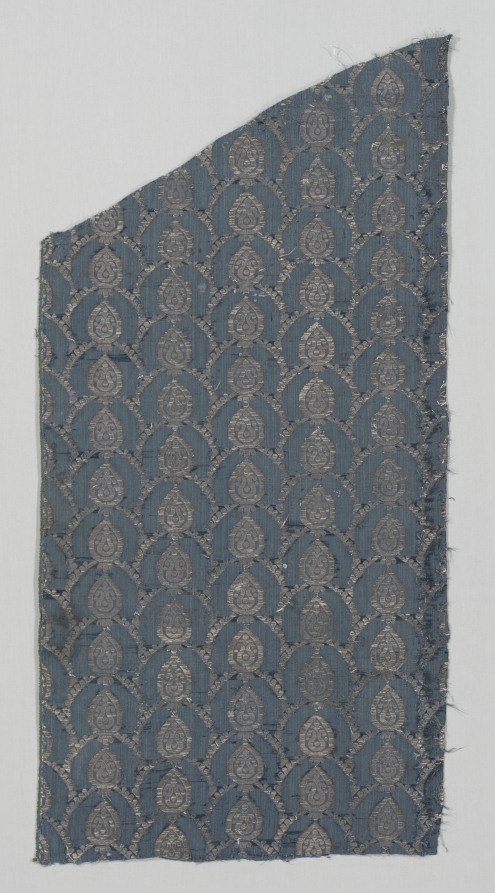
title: Length of Textile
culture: Italy, 17th century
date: 1600s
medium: plain cloth, brocaded; silk and metal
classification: Textile